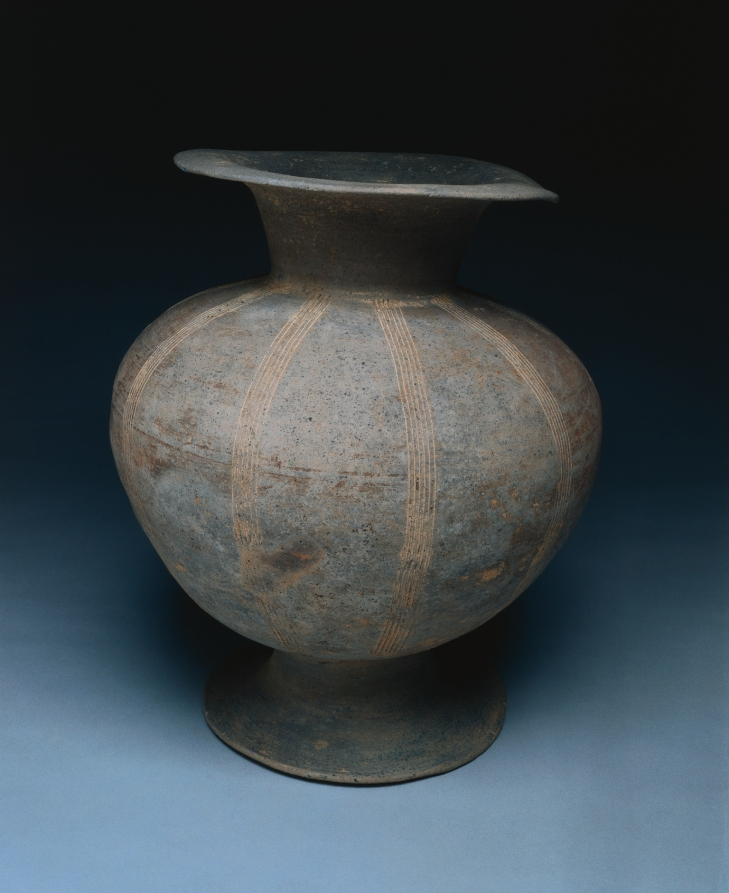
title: Pedestaled Vessel with Incised Band Design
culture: Korea, Proto-Three Kingdoms period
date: 300s CE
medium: earthenware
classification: Ceramic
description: This pedestaled earthenware was a product of closed kilns built on hillsides, which became widely used for producing this type of pottery vessel in Korea during the Three Kingdoms period. Both its gray color and shimmering glaze are the result of the reduction of oxygen in the closed kiln chamber. Due to its relatively tall pedestal, this vessel may have been used for more for ritual settings than everyday use.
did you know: This pedestaled earthenware may have been used for ritual offerings to ancestors.